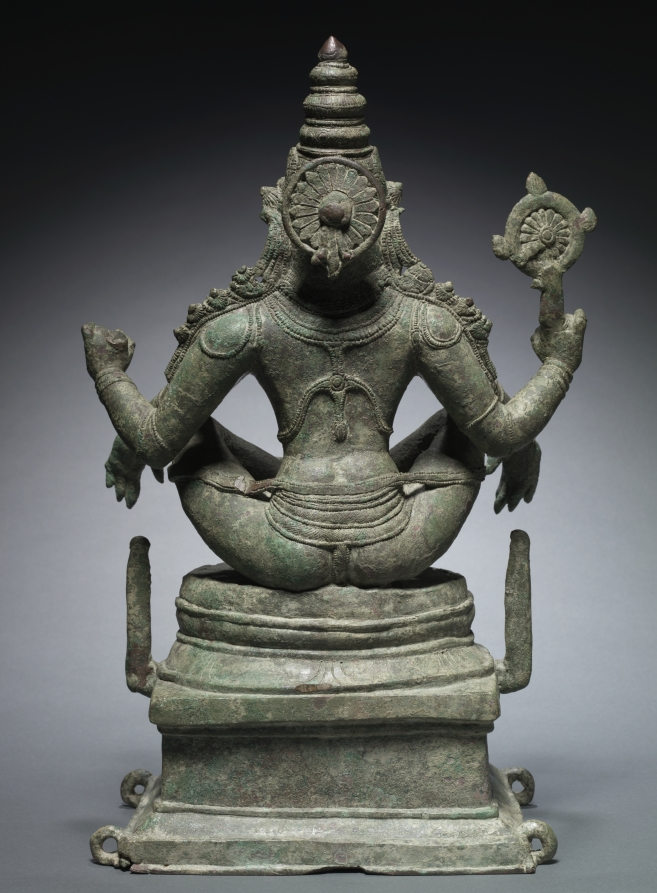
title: Yoga Narashimha, Vishnu in his Man-Lion Avatar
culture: South India, late Chola Period (900-13th Century)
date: c. 1250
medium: bronze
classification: Sculpture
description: The two posts on either side are for holding a halo that once encircled the figure.